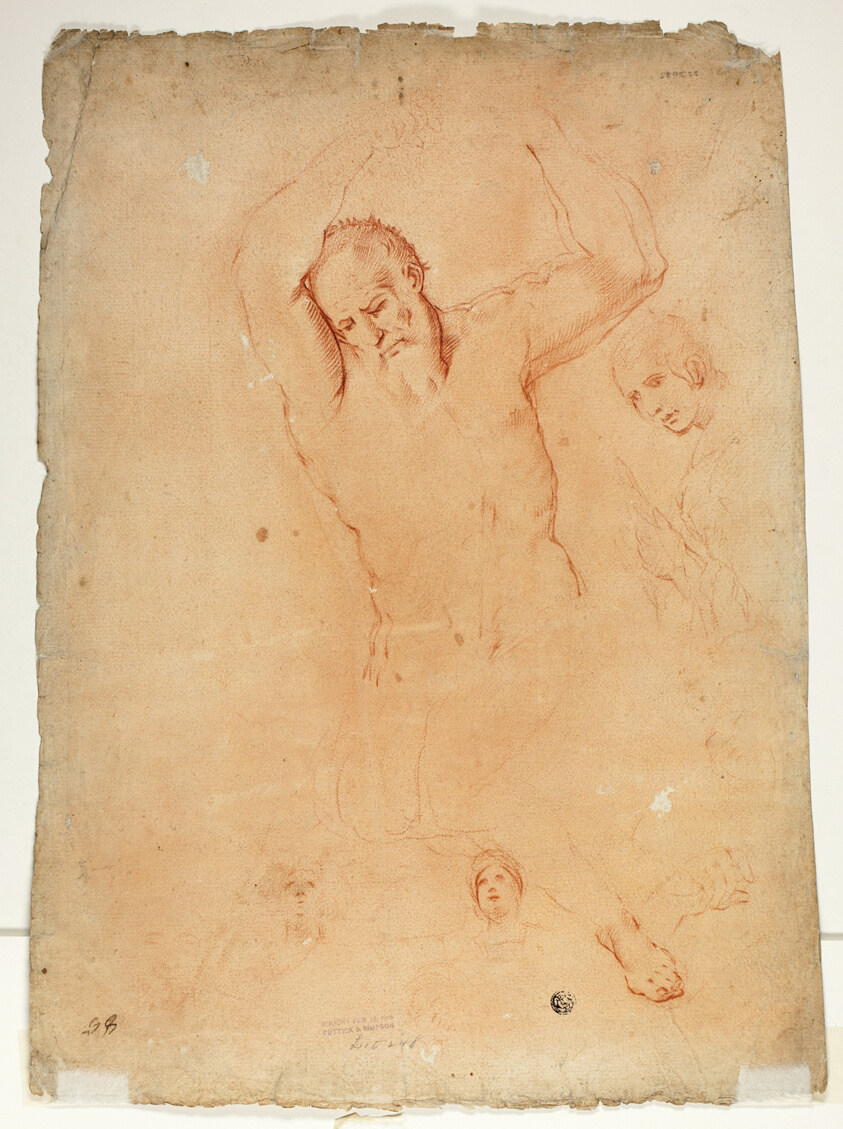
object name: Drawing and Watercolor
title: Saint John the Baptist Preaching (recto); Male Nude with Raised Arms and Sketches of Heads (verso)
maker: Luca Giordano (Italian, 1632-1705)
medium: Red chalk (recto and verso) on cream laid paper, prepared with a red chalk wash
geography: Italy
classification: chalk; drawings (visual works); prints and drawing; paper